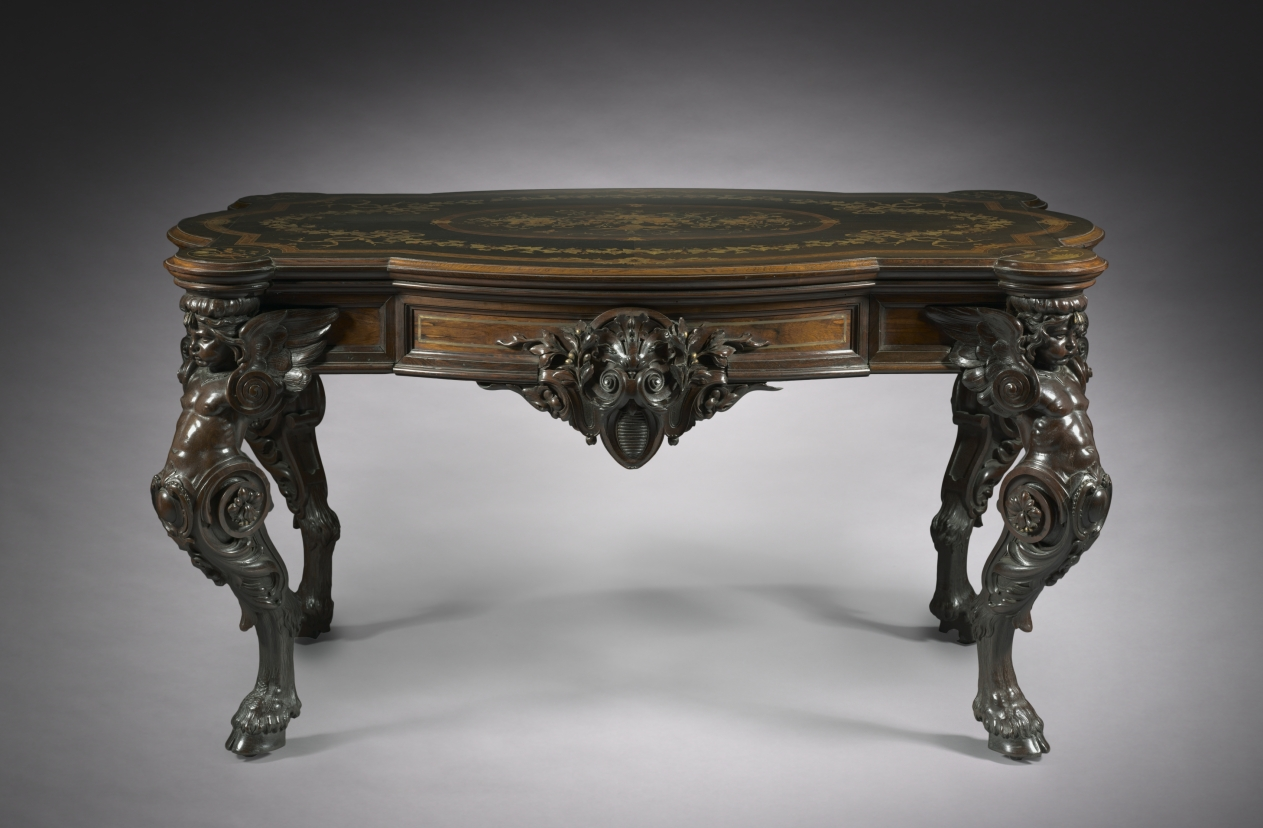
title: Center Table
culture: America, New York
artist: Gustave Herter Firm (American)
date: c.1860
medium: rosewood with marquetry of various woods, brass inlay, and gilding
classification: Furniture and woodwork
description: Gustave Herter was born in Germany and came to America about 1848. This table can be identified as his work because of its close resemblance to a table supplied by Herter about 1860 to the Victoria Mansion in Portland, Maine. The pictorial marquetry of the top may have been imported from France and incorporated into this table, probably made in New York.